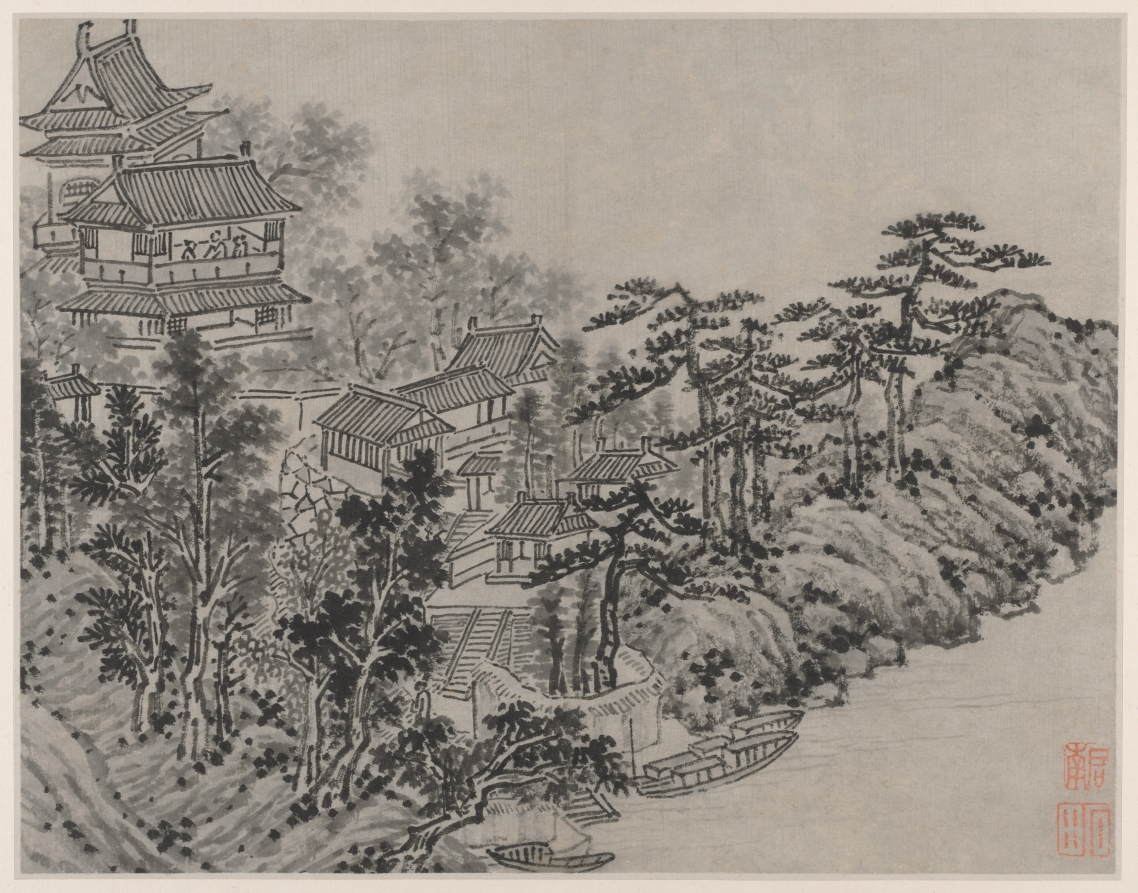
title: Cloud-Climbing Pavilion, from Twelve Views of Tiger Hill, Suzhou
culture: China, Ming dynasty (1368–1644)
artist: Shen Zhou (Chinese, 1427–1509)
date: after 1490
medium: Album leaf; ink on paper or ink and slight color on paper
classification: Painting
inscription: [印] 启南; 石田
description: Views of Tiger Hill depicts a historic site a few miles northwest of Suzhou. The scenes simulate a visit from arriving by boat at the foot of the mountain to climbing to Cloudy Cliff Monastery. Representations of the artist’s mature style, Shen Zhou included views in subtle colors in the suite of monochrome scenes. A Suzhou native, Shen Zhou was supported by family wealth and rejected an official career in favor of life as a retired scholar. Turning to painting in midlife, he is regarded as the founder of the Wu School of painting, with its center in Suzhou.